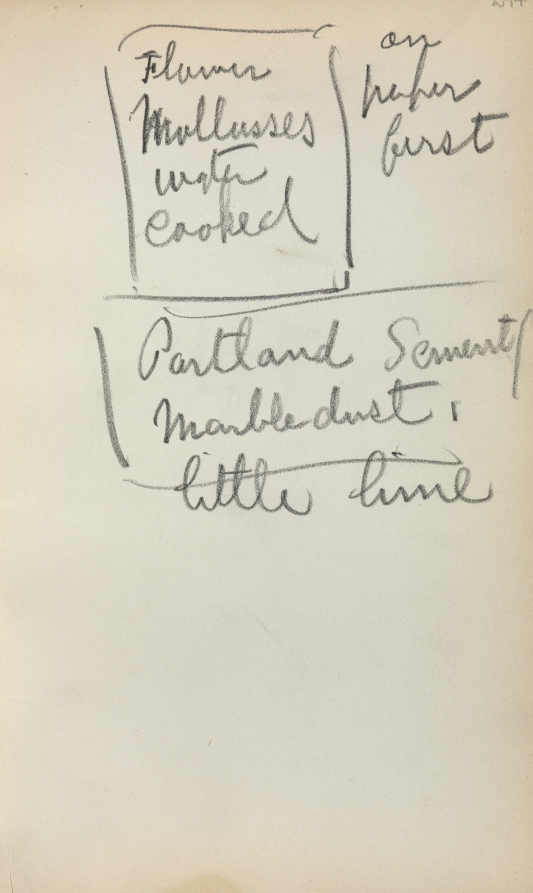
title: Italian Sketchbook: Notes (page 244)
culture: America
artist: Maurice Prendergast (American, born Newfoundland [now Canada], 1858–1924)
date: 1898–1899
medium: pencil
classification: Bound Volume